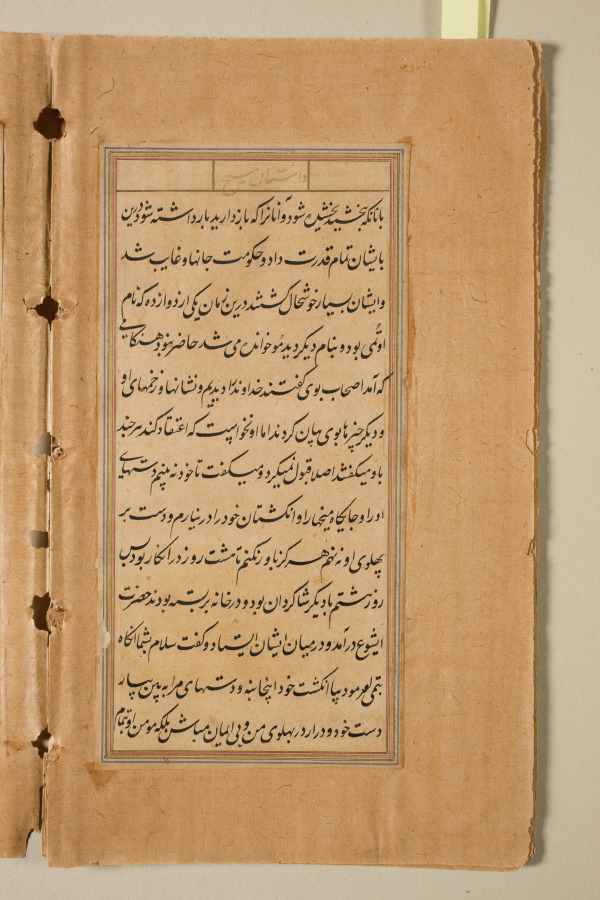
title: Text page from a Mirror of Holiness (Mir’at al-quds) of Father Jerome Xavier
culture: Mughal India, Allahabad, made for Prince Salim (1569–1627)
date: 1602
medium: Ink and gold on paper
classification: Manuscript